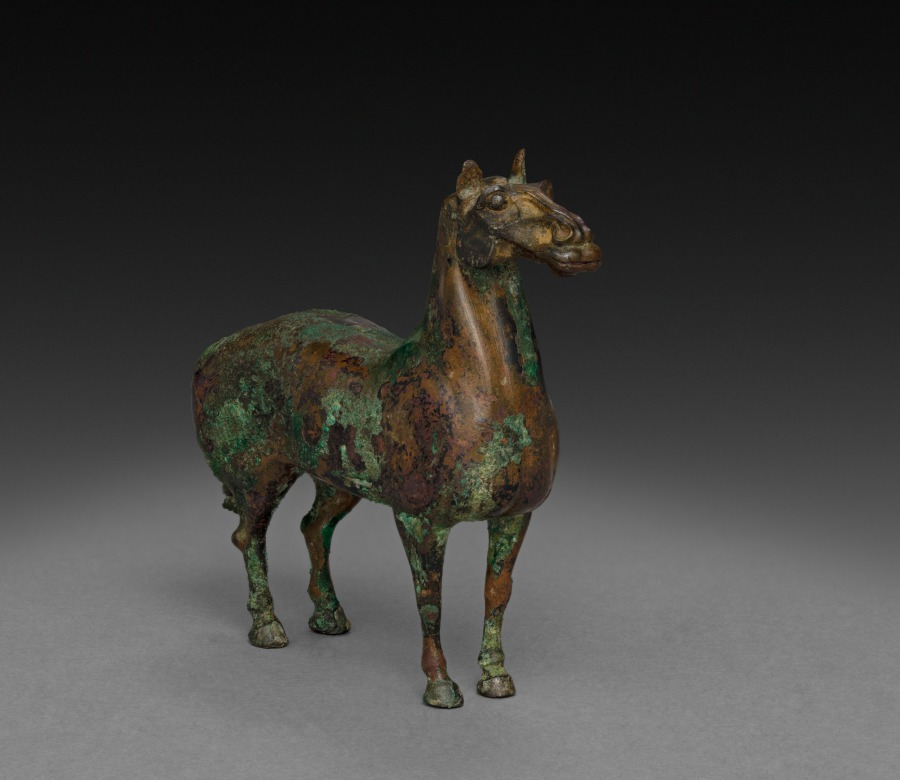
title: Standing Horse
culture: China, Han dynasty (202 BCE–220 CE)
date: 206 BCE–220 CE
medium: bronze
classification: Sculpture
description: The fine steed has indentations on both sides of its body, indicating that it was once harnessed and pulled a carriage. Substituting a real horse, it accompanied a tomb occupant into the afterlife.